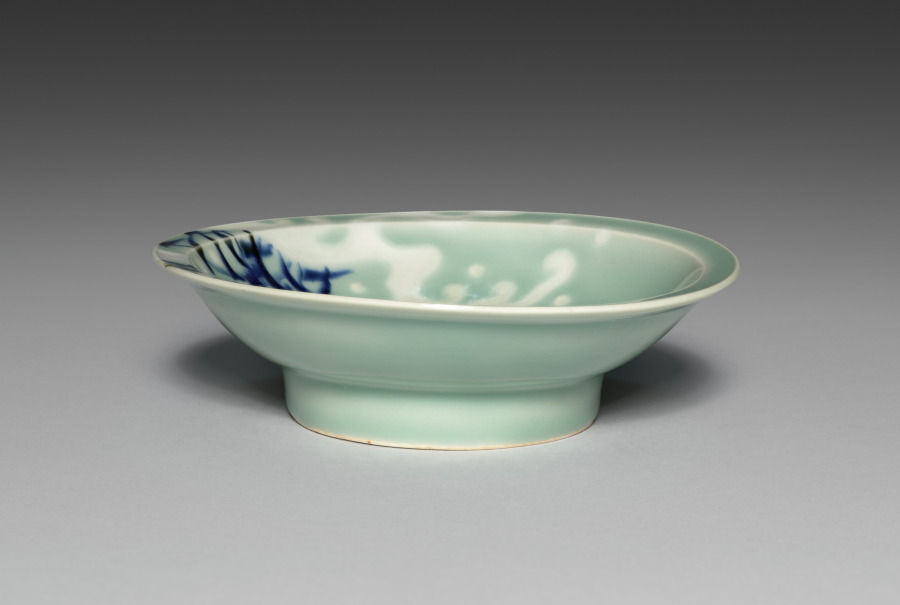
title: Small Dish (Kozara) with Waves and Reeds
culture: Japan, Edo period (1615–1868)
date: late 1600s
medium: Porcelain with underglaze blue and celadon (Hizen ware, Nabeshima type)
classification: Ceramic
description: This dish has a green glaze often called celadon in English.